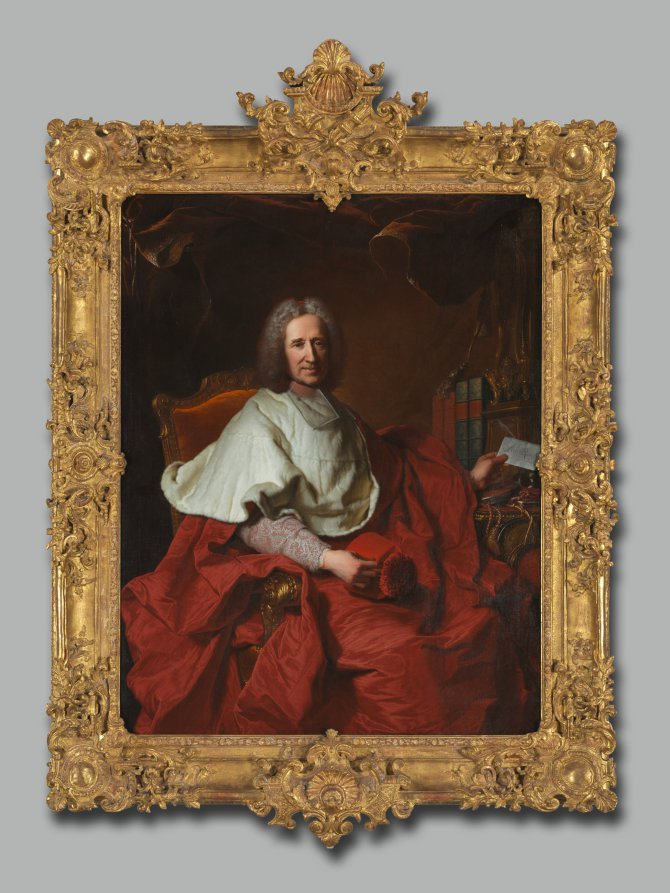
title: Portrait of Cardinal Guillaume Dubois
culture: France, 18th century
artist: Hyacinthe Rigaud (French, 1659–1743)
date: 1723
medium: oil on canvas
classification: Painting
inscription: signed on base of clock: fait par Hyacinthus Rigaud, 1723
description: With his luxurious, flamboyant dress—a voluminous wrap of scarlet silk topped by a short fur cape—the subject of Hyacinthe Rigaud’s portrait was clearly a man of consequence. Guillaume Dubois gained the favor of Louis XIV as tutor to his nephew, Philippe Charles, Duke of Orléans, and served as chief minister under Louis’s successors, the regent Duke of Orléans and Louis’s great-grandson, Louis XV. Dubois was appointed a Cardinal in the Catholic Church in 1721, a lofty aspiration at least partly motivated by political ambition: the title gave him the ability to remove political adversaries with impunity. Dubois holds a letter with the words Au Roy (to the king); this portrait was painted in the same year the young Louis XV ascended to the throne.